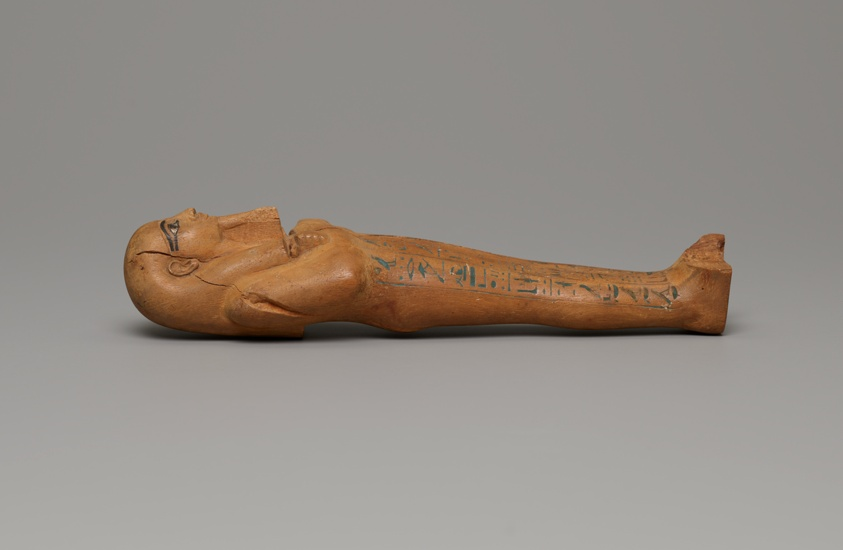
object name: Funerary Object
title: Shabti (Funerary Figurine) of Nebseni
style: new kingdom, eighteenth dynasty, ancient, egyptian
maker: Egyptian; Thebes (modern Luxor), Egypt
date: New Kingdom, early Dynasty 18, about 1570 BCE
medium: Wood (tamarisk) and pigment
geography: Egypt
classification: ushabti; wood; figurine; funerary; ancient art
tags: mummies, Hieroglyphs, figurines, writing